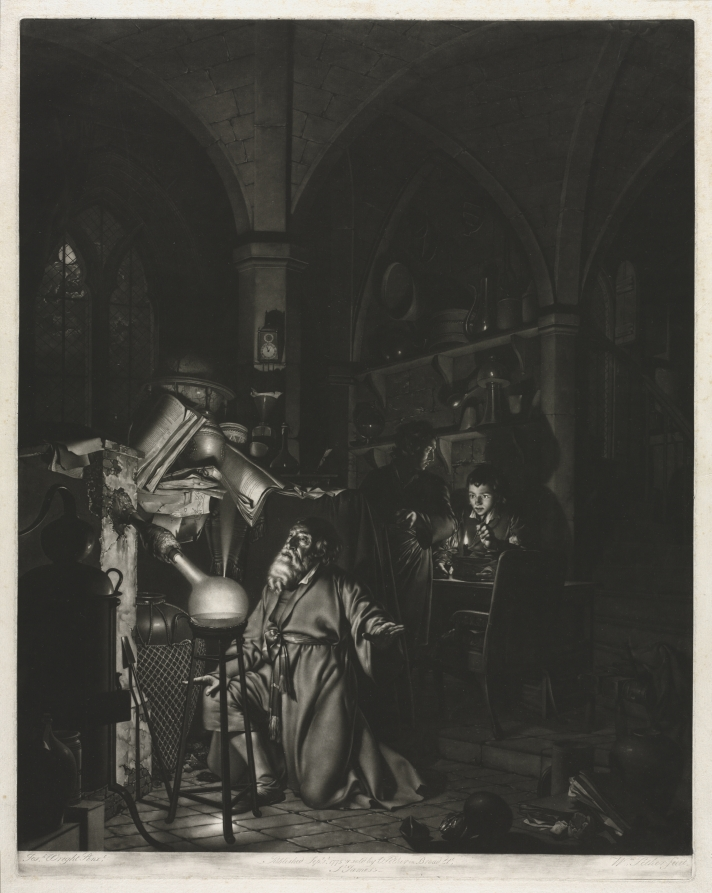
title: The Alchymist, in Search of the Philosopher's Stone, Discovers Phosphorus, and Prays for the Successful Conclusion of his Operation, as was the Custom of the Ancient Chymical Astrologers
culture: England, 18th century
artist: William Pether (British, c. 1738–1821)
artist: after Joseph Wright of Derby (British, 1734–1797)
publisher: William Pether (British (modern), 1728-1821)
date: 1775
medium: mezzotint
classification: Print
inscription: Lower left, in plate: Josh, Wright Pinxt.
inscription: Lower center, in plate: Published Sepr, 1t, 1775 & sold by WPether in Broad Stt, St James's-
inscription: Lower right, in plate: Wm, Pether fecit.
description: The print’s title and the medieval-looking interior filled with instruments identify the kneeling figure as an alchemist, someone who seeks the philosopher’s stone, a mythic substance that was thought to transform ordinary metals into gold and reverse the aging process. Here, the alchemist’s experiments accidentally lead him to discover the chemical element phosphorus, seen glowing in the flask before him. In choosing this moment of illumination, the artist crafted a potent allegory of the Enlightenment in which the creative force of imagination becomes true knowledge through reason and observation.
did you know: Joseph Wright of Derby’s composition was based on the story of Hennig Brand, the German alchemist who accidentally discovered phosphorus in 1676.